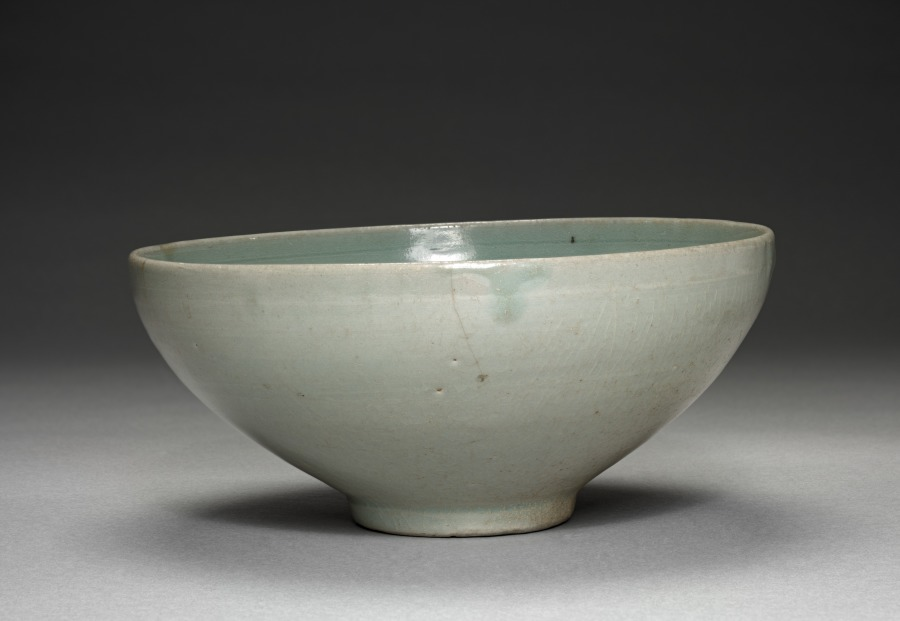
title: Bowl with Incised Parrot Design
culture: Korea, Goryeo dynasty (918–1392)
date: 1100s-1200s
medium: glazed porcelain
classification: Ceramic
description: As early as the 600s, the practice of drinking tea and wine became an important part of elite leisure culture in Korea. A wide bowl like this example was especially suitable for drinking powdered tea shaved from a compressed tea cake, the most commonly enjoyed type during the Goryeo period. The image of flying parrots inscribed on the inner wall of this tea bowl may have made the moment of drinking tea much enjoyable.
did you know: On the base of this tea bowl, three small spur marks made of bits of clay remain visible, indicating an individual protective casing of fire clay (saggar).